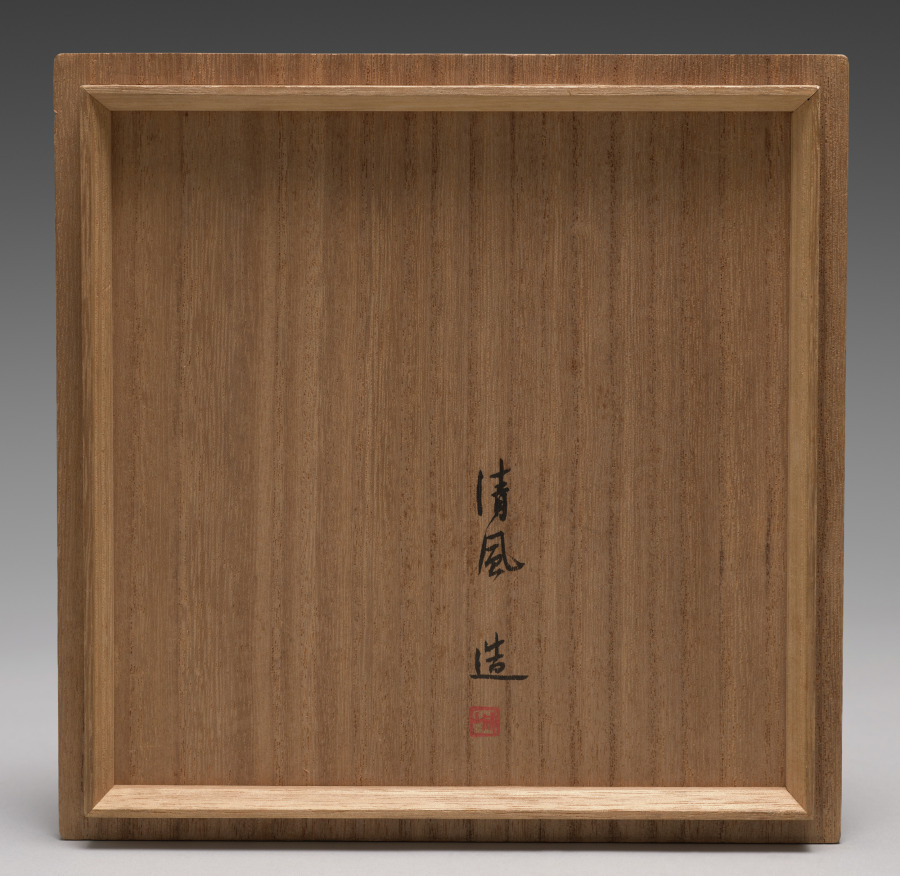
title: Sweets Bowl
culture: Japan, Taishō period (1912–26) or Shōwa period (1926–89)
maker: Seifū Yohei IV (Japanese, 1872–1951)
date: 1914–46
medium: Porcelain with coral red glaze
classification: Ceramic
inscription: 清風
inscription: 成山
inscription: 清風造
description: Like his father, Yohei IV also produced works with red monochrome glazes, like this red coral–glazed sweets bowl with white interior.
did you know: Seifū Yohei IV was active at home and abroad and won international recognition for his ceramic's glazes and designs.